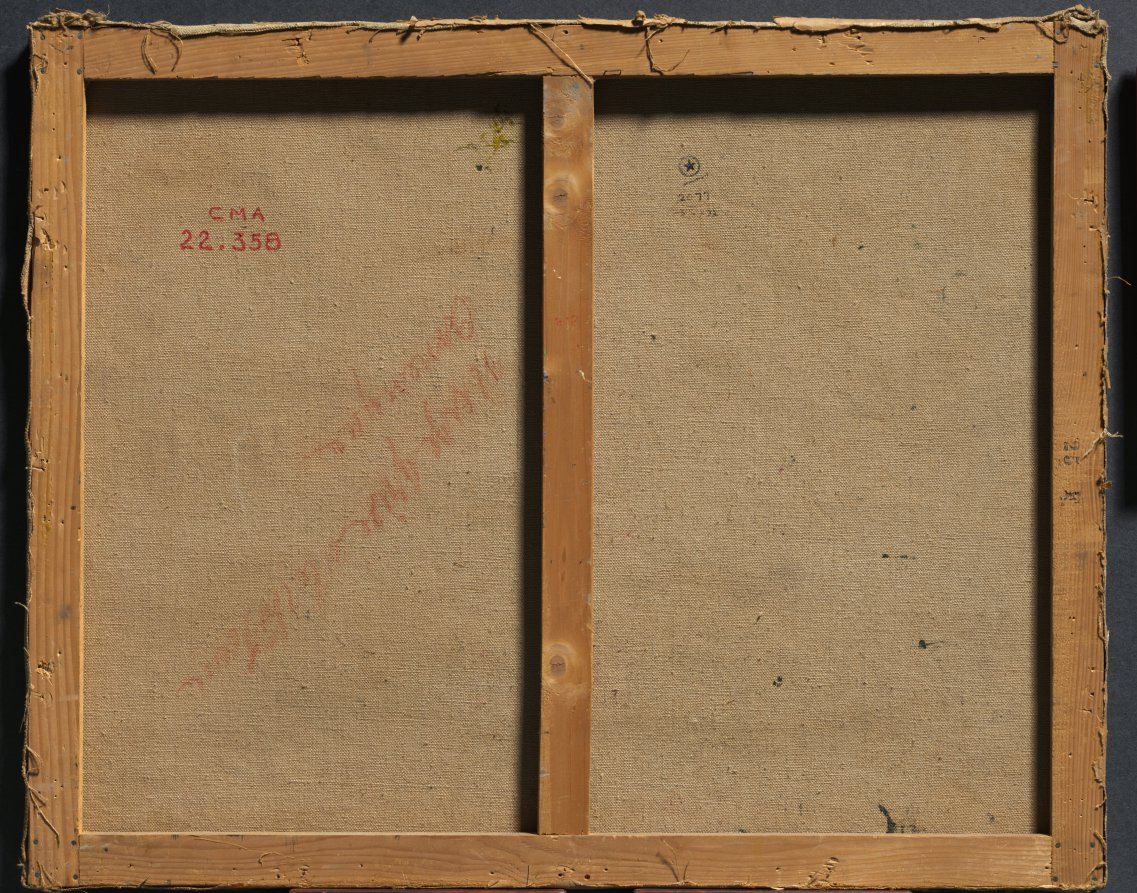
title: Murol in the Snow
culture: France, 20th century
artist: Victor Charreton (French, 1864–1936)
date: c. 1920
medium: oil on canvas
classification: Painting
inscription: Signed lower right: "Victor Charreton"